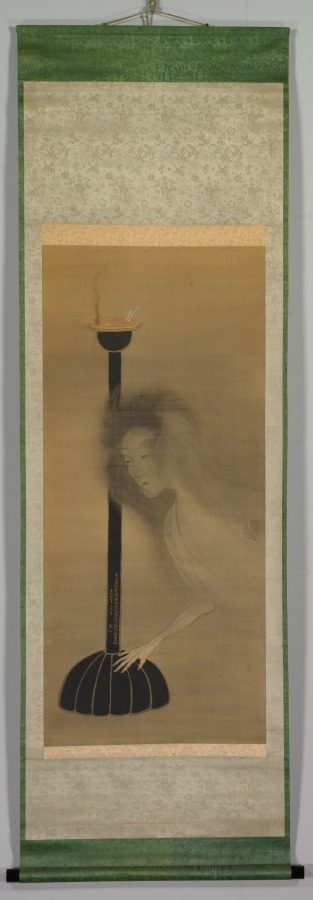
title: Ghost and Oil Lamp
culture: Japan, Edo period (1615–1868)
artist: Tani Bun'ichi (Japanese, 1787–1818)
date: 1810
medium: hanging scroll, ink, color, and gold on silk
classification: Painting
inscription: artist's inscription on stem of oil lamp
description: Tani Bun’ichi was the adopted son of Tani Buncho (1763-1840), a master painter and connoisseur. A Bun’ichi painting remarkably similar to this one that depicts a ghost by a lacquer lamp stand, is in the collection the Tokyo temple Zensho-an. That painting once belonged to Sanyutei Encho (1839-1900), a famed raconteur of ghost stories who donated his collection of ghost paintings to the temple. An inscription in gold on the lamp stand in this painting, identical in content to that on the Zensho-an painting, indicates that it was executed in the 12th month of 1810. Bun’ichi explains that he did not like painting ghosts, but tried it out after listening to a person by the name of Ono.